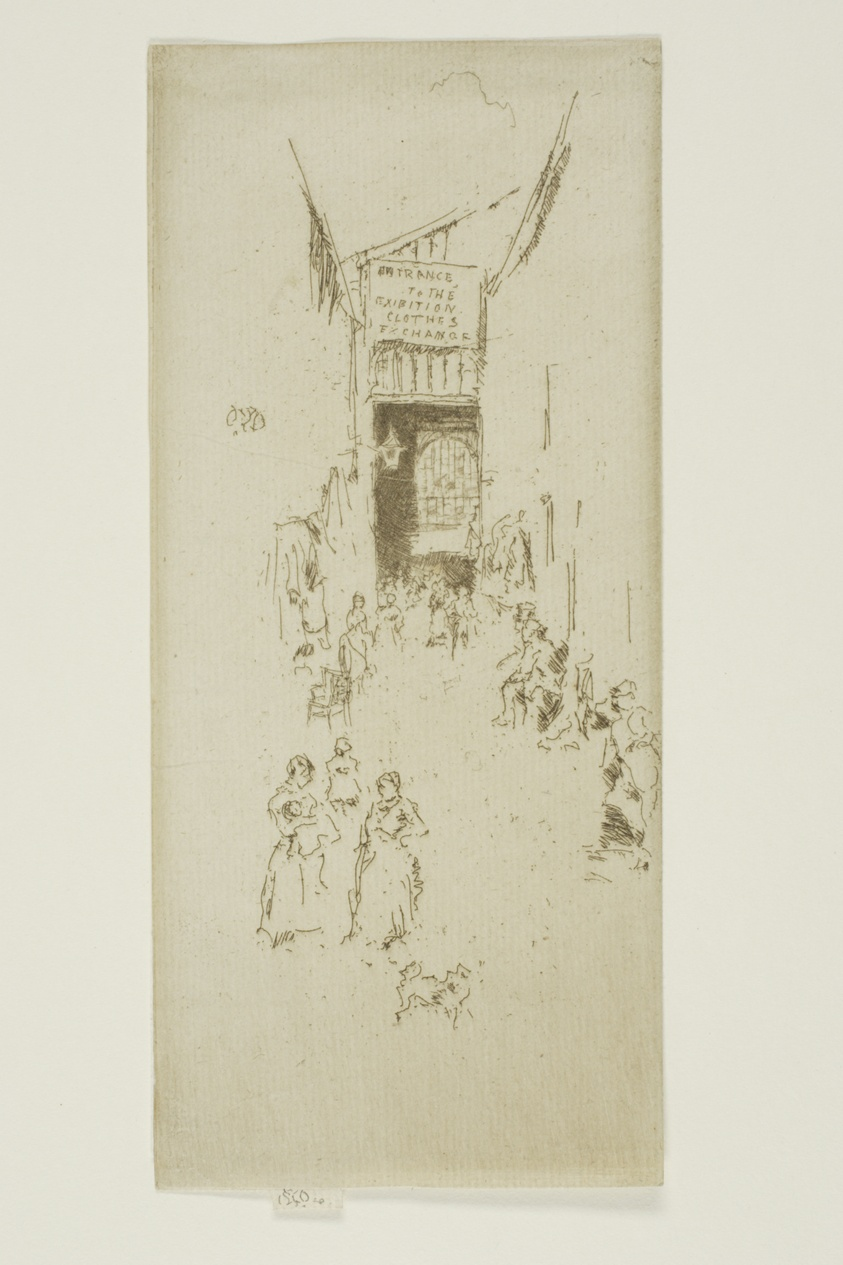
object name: Print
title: Fleur-de-lys Passage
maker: James McNeill Whistler (American, 1834-1903)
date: 1887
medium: Etching and drypoint with foul biting in dark brown ink on buff laid paper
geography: United States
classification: etching; foul biting; print; prints and drawing; drypoint; paper